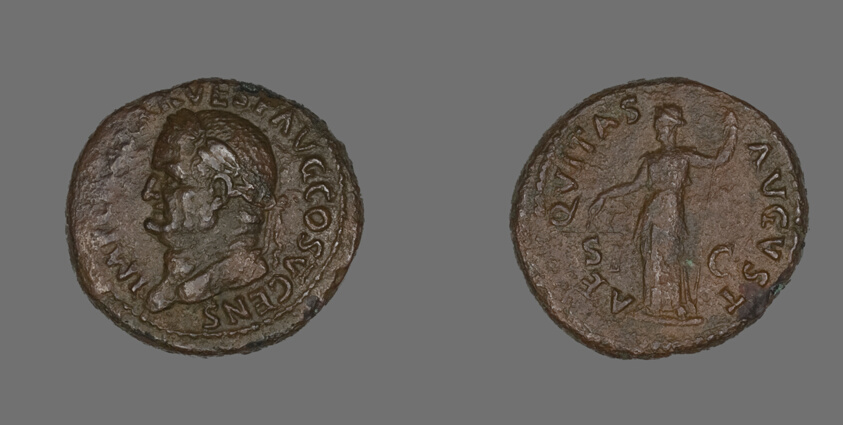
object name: Coin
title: As (Coin) Portraying Emperor Vespasian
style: roman (ancient, style or period)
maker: Roman, minted in Rome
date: 74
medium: Bronze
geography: Roman Empire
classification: coin; ancient art